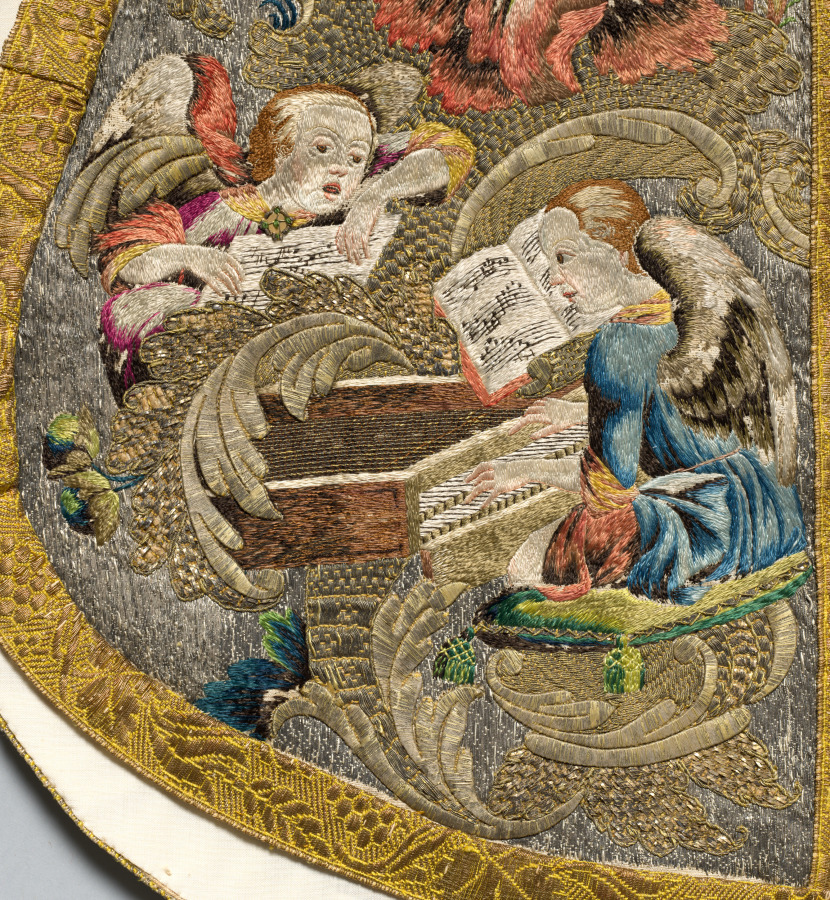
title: Chasuble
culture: Germany, Bavaria, last quarter of 17th century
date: 1675–99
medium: Silk and metallic threads on silk tabby sewn down on a linen tabby ground; embroidery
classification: Embroidery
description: This rare chasuble decorated with angels, musicians, pomegranates, and flowers represents Sacred and Profane Love. This is indicated by two figures—a clear-sighted figure embracing a blindfolded figure—standing on a globe in the upper center and also by the musicians. The angels play soft-sounding instruments (harpsichords, harps, viole da barccio, and flutes) while earthy figures play loud instruments (tambours and hunting horns). The chasuble was most likely part of a liturgical set commissioned for a wedding. This entire chasuble is embroidered with silk and metal thread laid over linen and stitched in place. The exceptionally fine workmanship, lavish use of gold and silver, and brilliant silk thread create this sumptuous vestment.